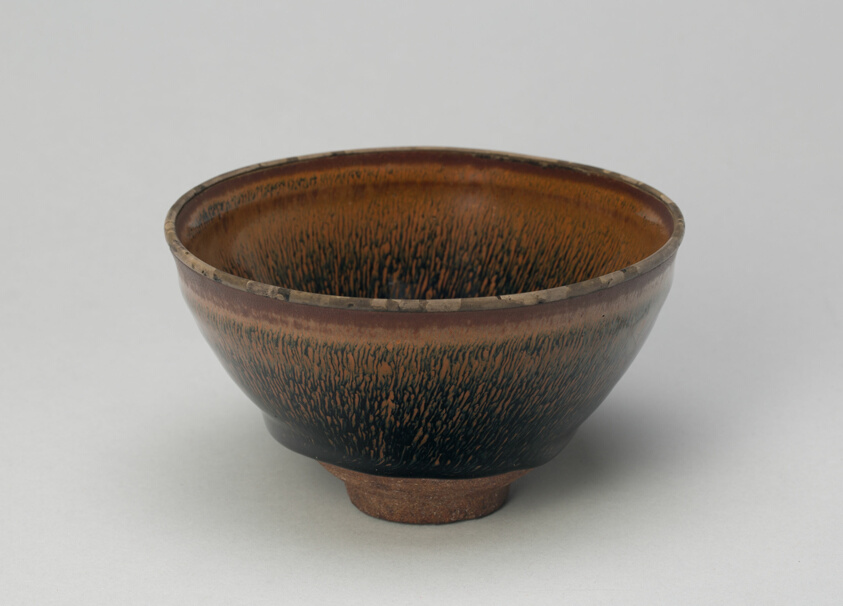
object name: Vessel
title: Tea Bowl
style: Chinese (culture or style)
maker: China, Fujian Province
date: Song dynasty (960–1279), 12th century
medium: Jian ware; dark-gray stoneware with dark-brown glaze and overglaze “hare’s fur” markings in iron oxide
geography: China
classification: drinking vessel; stoneware; asian art; ceramics; vessel